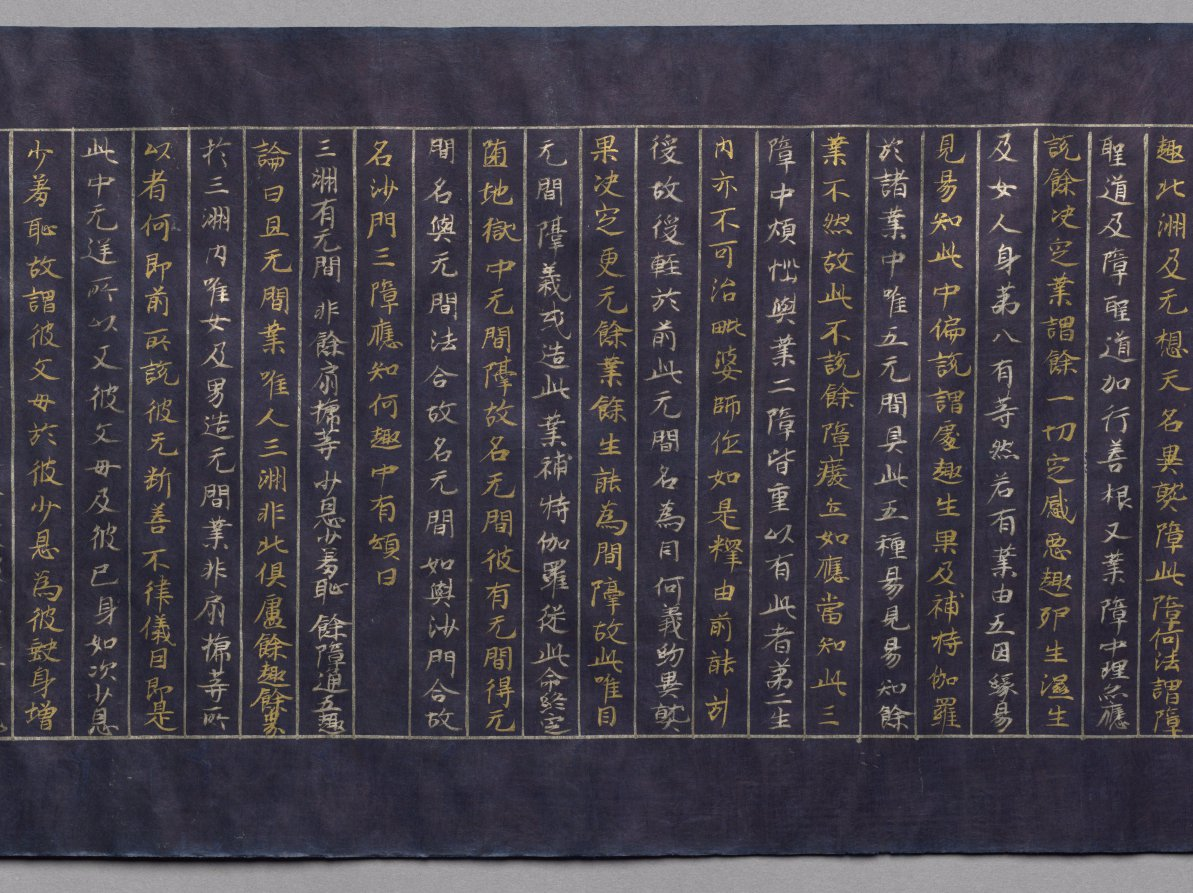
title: Meta-Discourse on the Teachings from the Treasury (Abidharmakosha-Bhashya)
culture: Japan, Heian period (794–1185)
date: 1100s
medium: handscroll; gold and silver on indigo-dyed paper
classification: Manuscript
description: This religious text relates some of the teachings of the great fourth-century Indian Buddhist scholar Vasubhandhu. The text analyzes human consciousness in its relationship to the environment and transformations that occur during meditation. This scroll is the 17th part of a 30-part translation of the text by Xuanzang, an eminent seventh-century Chinese monk.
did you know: The frontispiece depicts the Buddha Shakyamuni preaching in a paradisical landscape.